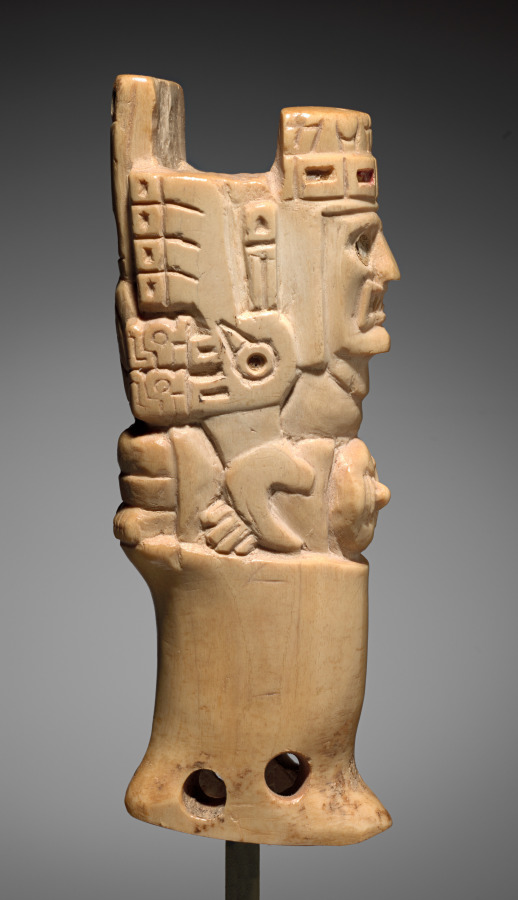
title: Thumb Rest of a Spear Thrower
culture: Andes, Wari people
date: 600–1000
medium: Bone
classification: Implements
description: This object was lashed to a spear thrower, where it served as a thumb rest or grip. The imagery is suited to the use: a supernatural being throttles a human, turning its head to expose its throat to a knife the being holds in one hand. Thus, the scene captures the crucial moment of an offering likely intended to assure the benevolence of divine forces.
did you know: Spear throwers, also called atlatls, use leverage to propel a spear faster and farther.